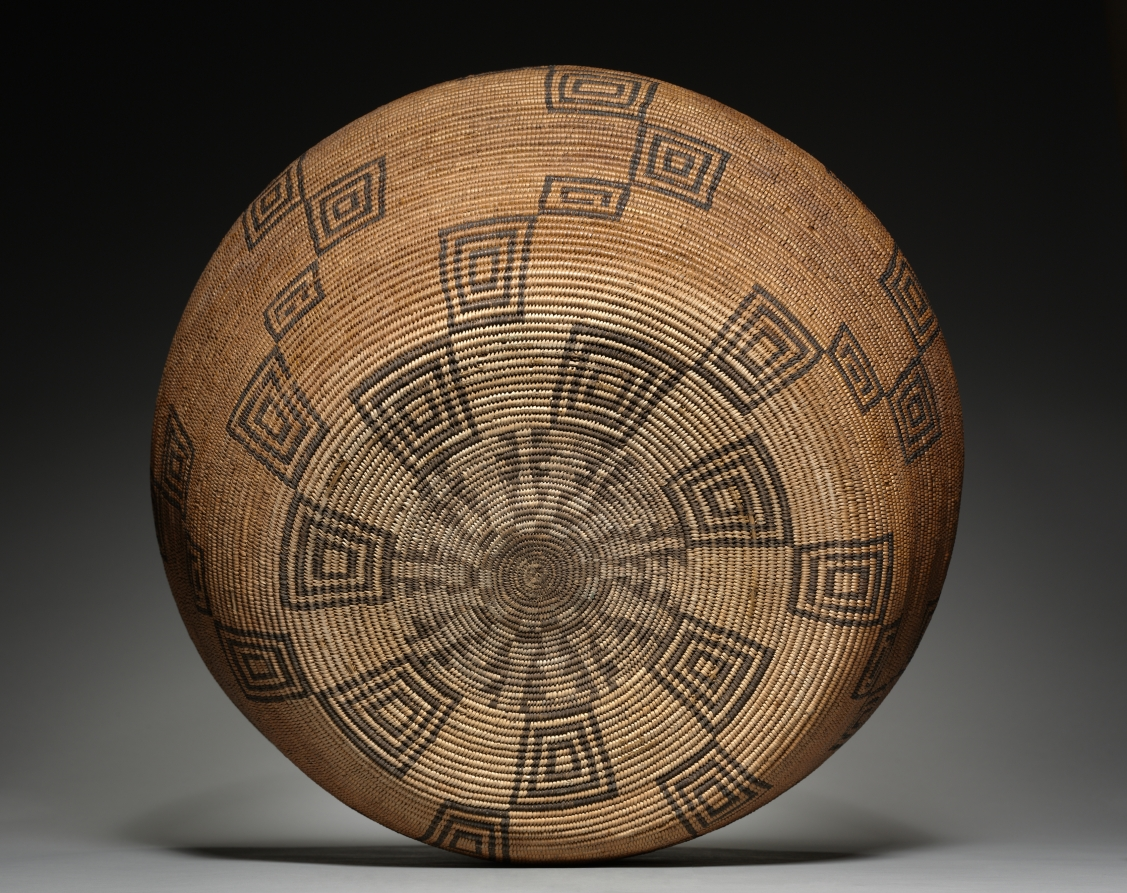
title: Grain Storage Basket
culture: Southwest, White Mountains, Arizona, Apache, 19th century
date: late 1800s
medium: coiled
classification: Basketry